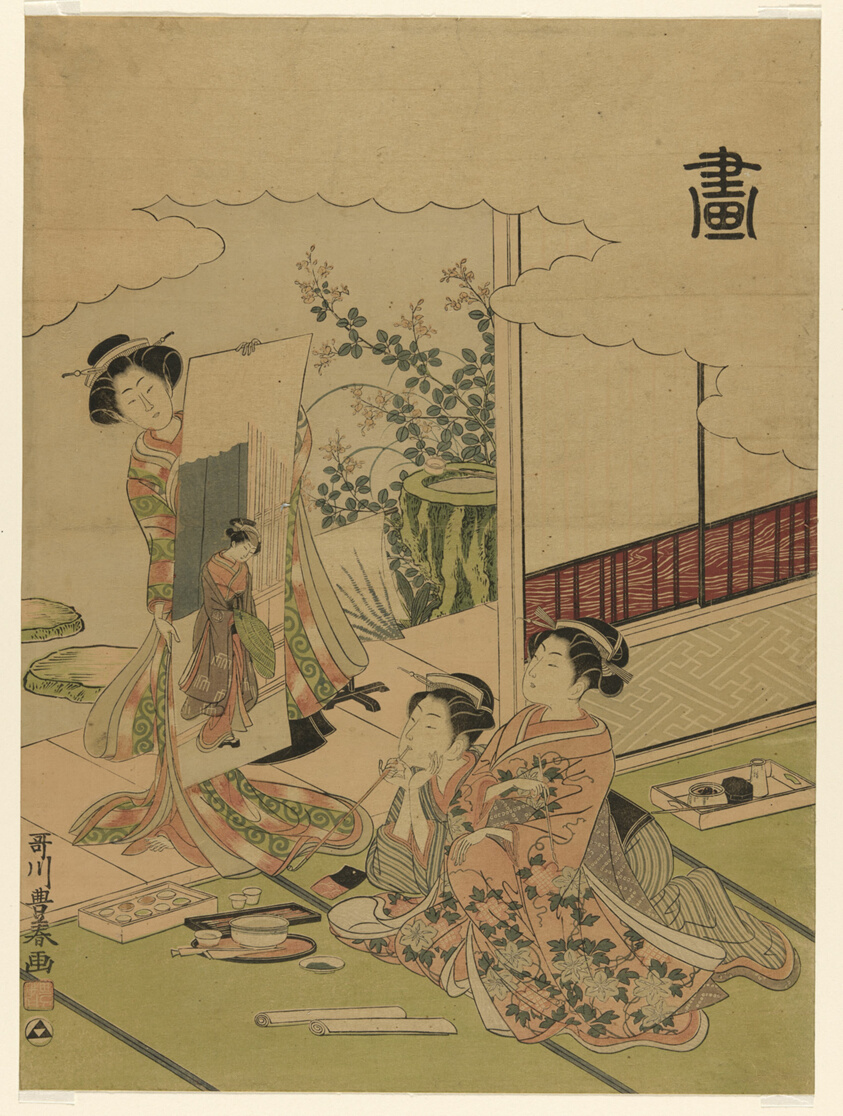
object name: Print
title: Painting (Ga), from an untitled series of the four accomplishments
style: Japanese (culture or style)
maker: Utagawa Toyoharu (Japanese, 1735-1814)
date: c. 1772/75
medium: Color woodblock print; o-oban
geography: Japan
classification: woodblock print; print; asian art